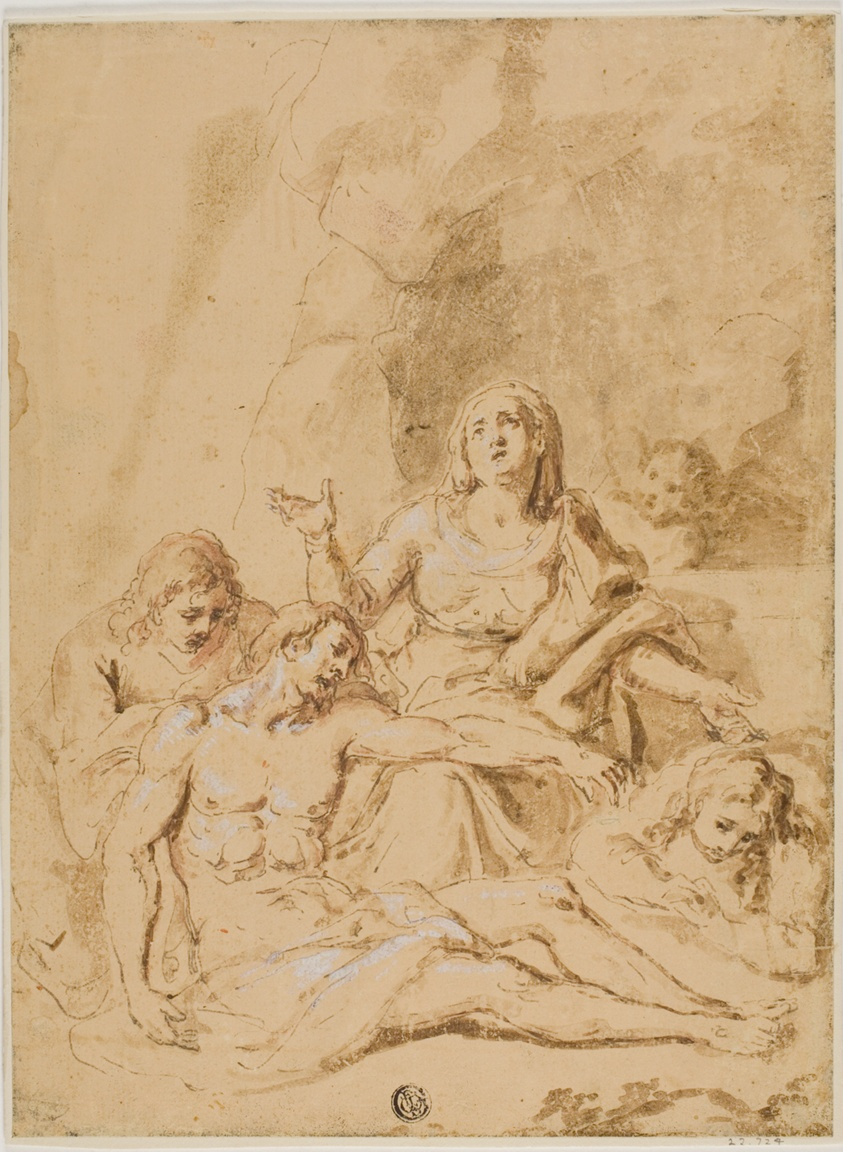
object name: Drawing and Watercolor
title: Pietà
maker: Possibly Carlo Dolci (Italian, 1616-1686); or after Annibale Carracci (Italian, 1560-1609)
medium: Pen and brown ink with brush and brown and red wash, heightened with white gouache, on tan ground on laid paper, laid down on cream wove board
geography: Italy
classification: ink or chalk wash; drawings (visual works); prints and drawing